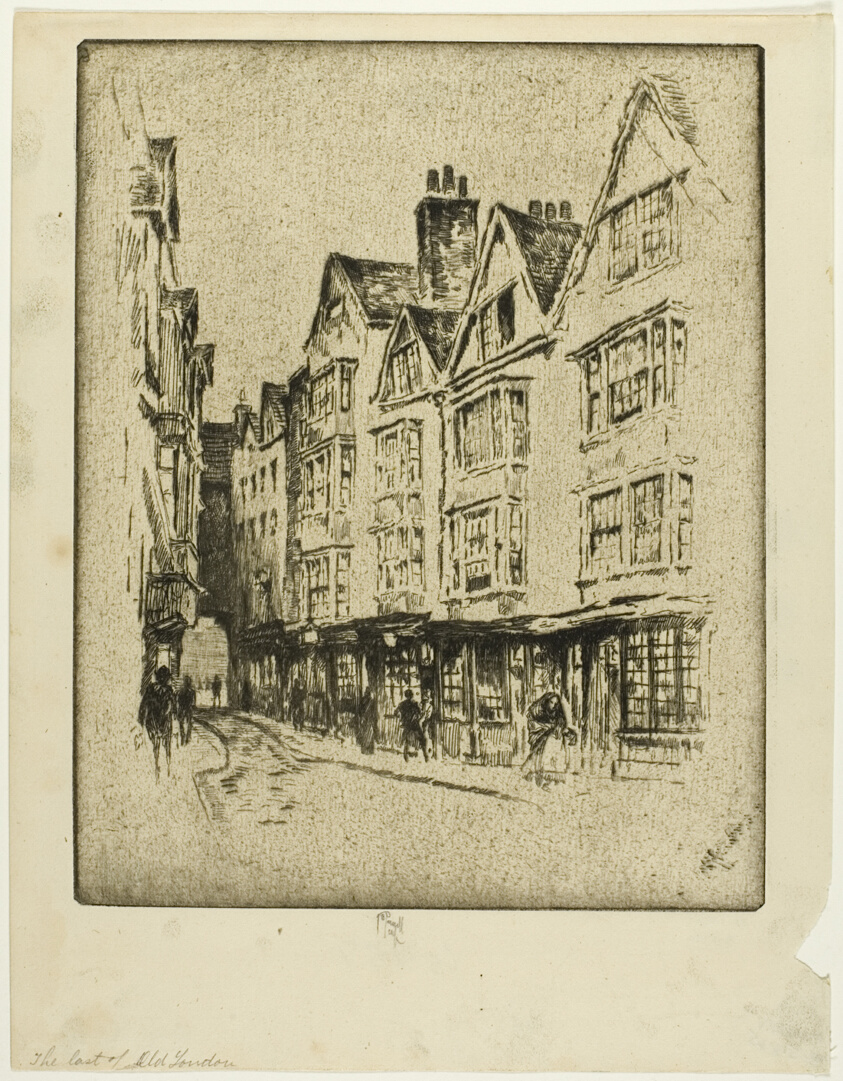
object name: Print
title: Last of Old London, Cloth Fair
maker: Joseph Pennell (American, 1857-1926)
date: 1907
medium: Etching on ivory wove paper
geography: United States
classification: etching; print; prints and drawing